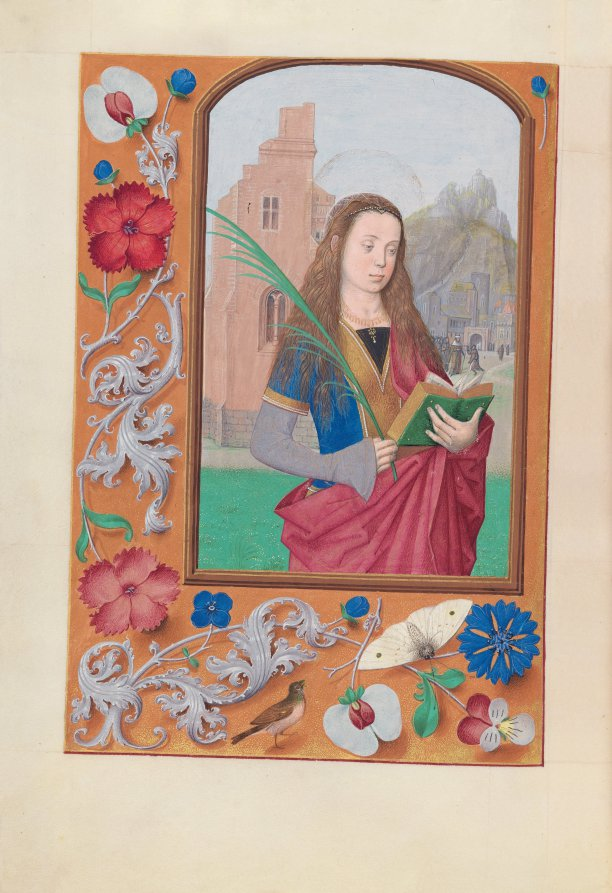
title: Hours of Queen Isabella the Catholic, Queen of Spain: Fol. 191v, St. Barbara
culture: Flanders, Ghent and Bruges, late 15th century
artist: Master of the First Prayerbook of Maximillian (Flemish, c. 1444–1519)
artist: and Associates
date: c. 1500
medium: ink, tempera, and gold on vellum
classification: Bound Volume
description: This manuscript was illuminated by a circle of at least five highly organized manuscript painters active in the Flemish cities of Ghent and Bruges. The principal illuminator was Alexander Bening, who painted the majority of the book's miniatures. Manuscripts produced by this circle of artists are renowned for the decoration of their borders, which typically feature a rich variety of realistically-painted flowers, birds, and butterflies. This prayer book, called a book of hours, was intended not for a cleric, but for the private devotions of a lay person-in this case, Isabella the Catholic, Queen of Spain (1451-1504). Isabella's coat of arms embellishes the book's frontispiece. It is unlikely that the book was commissioned by the Queen herself; rather, she probably received it as a diplomatic gift from someone courting her patronage, perhaps Cardinal Francisco Jimenez de Cisneros. A Franciscan friar, Jimenez was dependent upon Isabella for his advancement, first to the post of Queen's confessor in 1492, and then to Archbishop of Toledo in 1495.